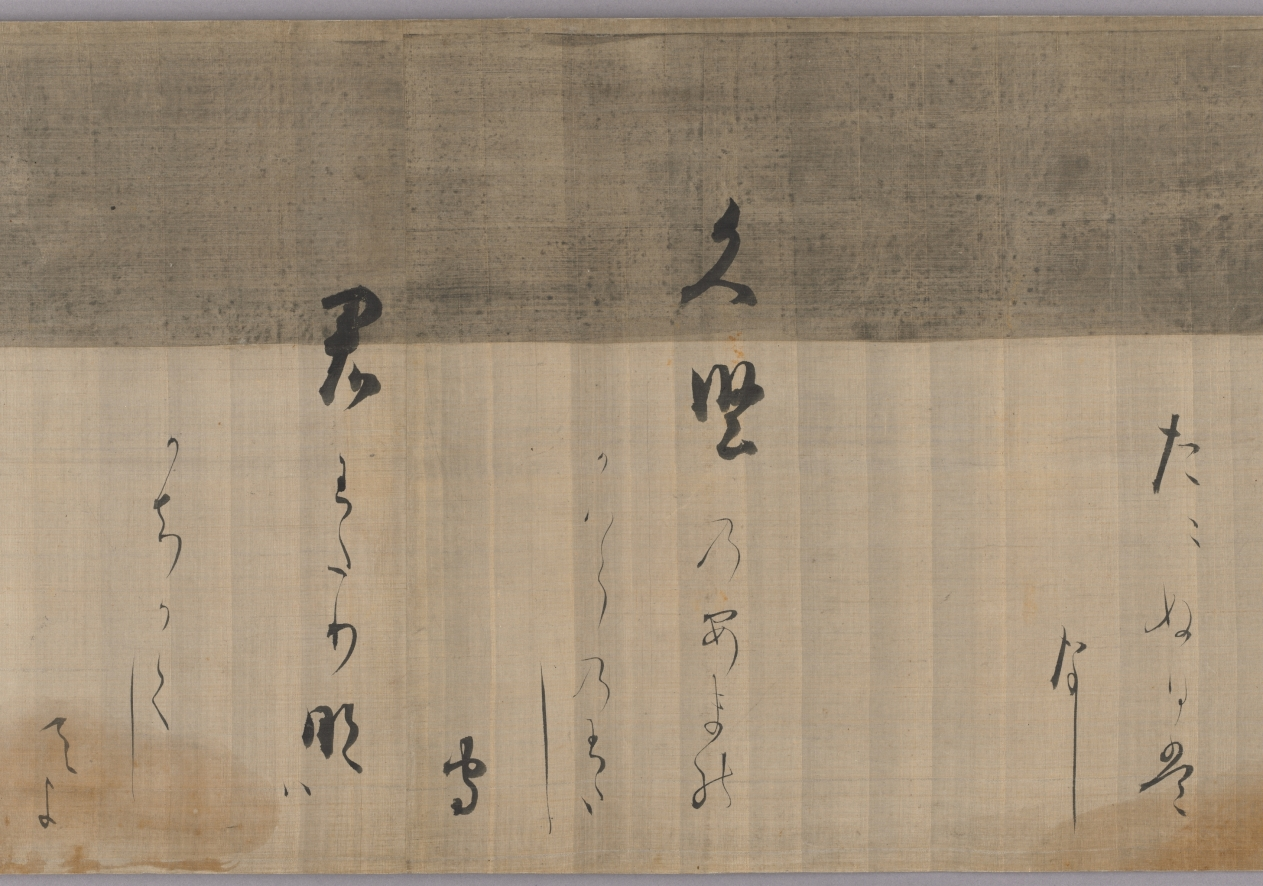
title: Selections from the Collection of Japanese Poems from Ancient and Modern Times (Kokin wakashū) with Design of Pines Along the Shore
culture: Japan, Momoyama period (1573-1615) to Edo period (1615-1858)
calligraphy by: Hon'ami Kōetsu (Japanese, 1558–1637)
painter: attributed to Tawaraya Sōtatsu (Japanese, c. 1570–c. 1640)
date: 1600s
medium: handscroll; ink on silk with gold and silver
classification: Calligraphy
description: The calligrapher and craftsman Hon’ami Kōetsu frequently collaborated with Tawaraya Sōtatsu, a painter who ran a studio that produced fans and screens. Sōtatsu’s work featured abstracted and flattened shapes, fields of color and gold, and asymmetry. In particular, motifs that appeared in small scale, such as flora and fauna, in early decorated Japanese papers were painted in a larger scale—blown up as if seen under a magnifying glass. For this handscroll, Kōetsu brushed poems from the autumn section of a poetry anthology onto silk with a landscape of pines in gold and silver likely painted by Sōtatsu.